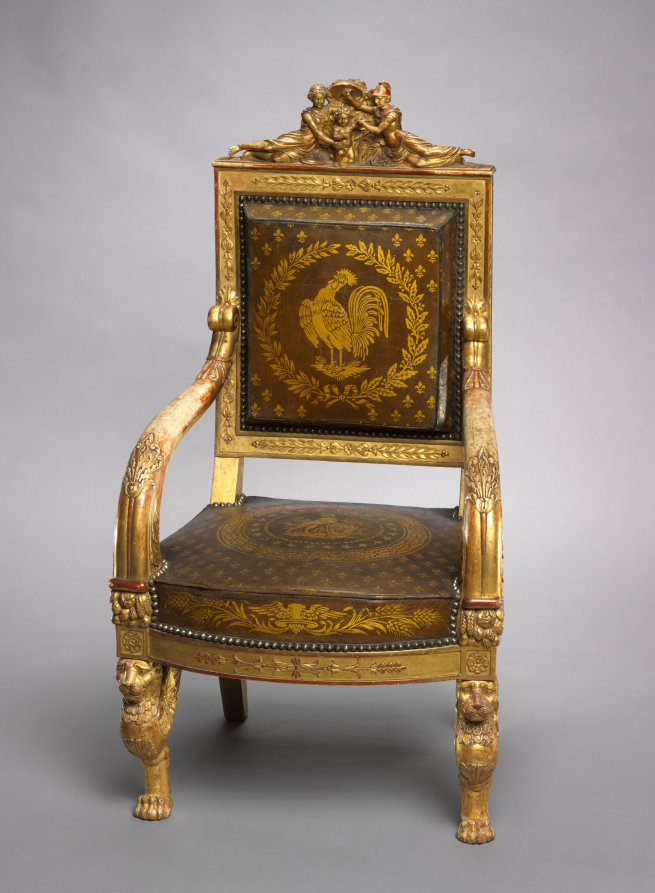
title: Child's Throne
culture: France, Paris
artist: Pierre-Marie Balny le Jeune (French, 1832)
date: 1822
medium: carved and gilded wood, leather upholstery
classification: Furniture and woodwork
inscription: inscribed with stencils inside back rail: BLONDEL TAPISSIER/RUE ST. ANTOINE N 72 1822 inscribed in ink lower edge back rail: 12 JANVIER 18[22?]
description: This chair was made for the young, presumed successor to the French throne who ruled briefly as Henri V in 1830, the last of the direct Bourbon line. He is depicted at the center of the top rail protected by female figures representing France and Minerva, the Roman goddess of wisdom. Fleurs-de-lis and the Gallic rooster, symbols of French royalty and the French people, decorate the upholstery.